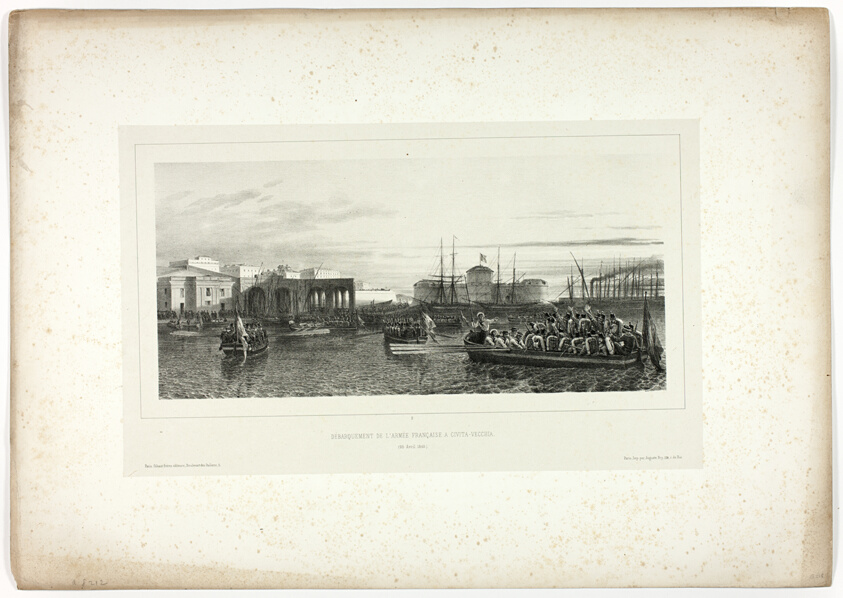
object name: Print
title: The French Army Landing at Civita-Vecchia, April 25, 1849, from Souvenirs d’Italie: Expédition de Rome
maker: Denis Auguste Marie Raffet (French, 1804-1860); printed by Auguste Bry (French, 19th century); published by Chez Gihaut Frères (French, 19th century)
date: 1851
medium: Lithograph in black on buff wove China paper laid down on ivory wove paper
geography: France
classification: lithograph; print; prints and drawing